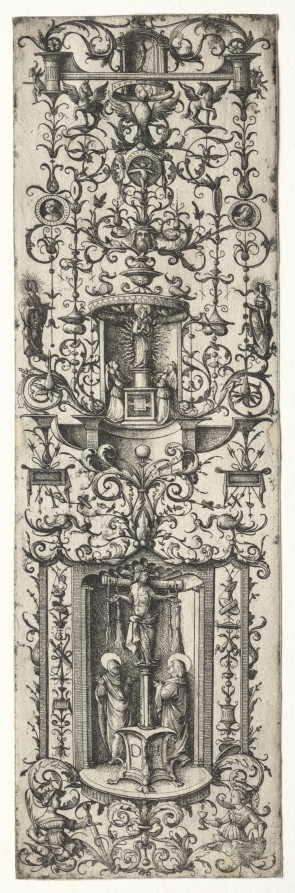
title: Ornamental fillet with the crucifixion and the virgin and child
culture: Germany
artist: Daniel Hopfer (German, c. 1470–1536)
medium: etching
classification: Print